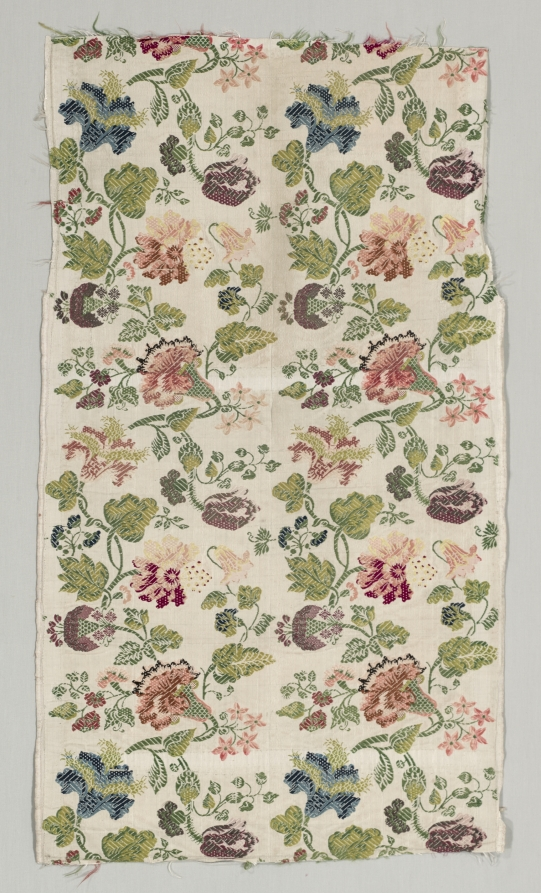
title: Textile Fragment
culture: Italy, 18th century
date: 1700s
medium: brocade, silk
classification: Textile